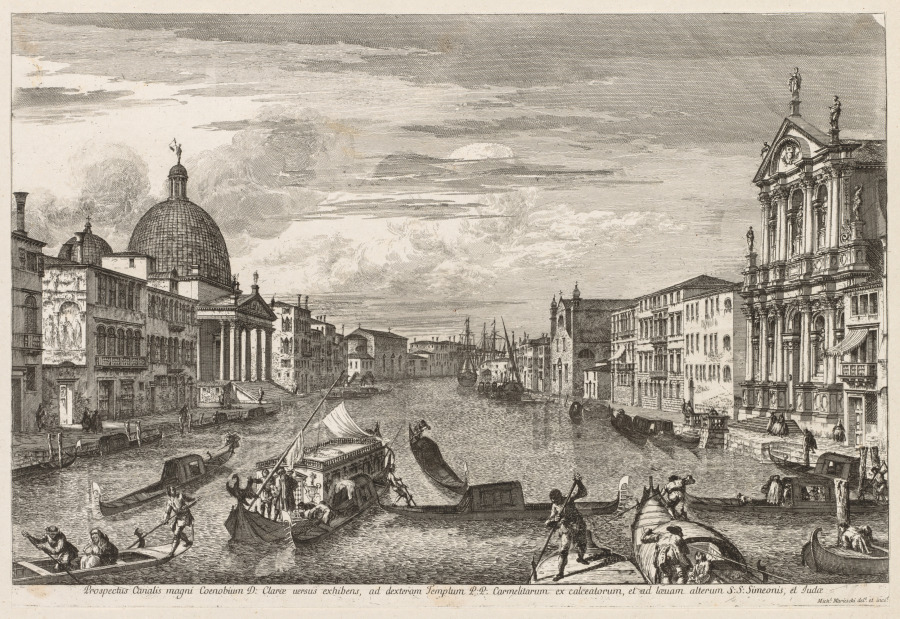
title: Views of Venice: Santa Chiara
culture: Italy, 18th century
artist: Michele Marieschi (Italian, 1710–1743)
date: 1741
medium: etching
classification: Print